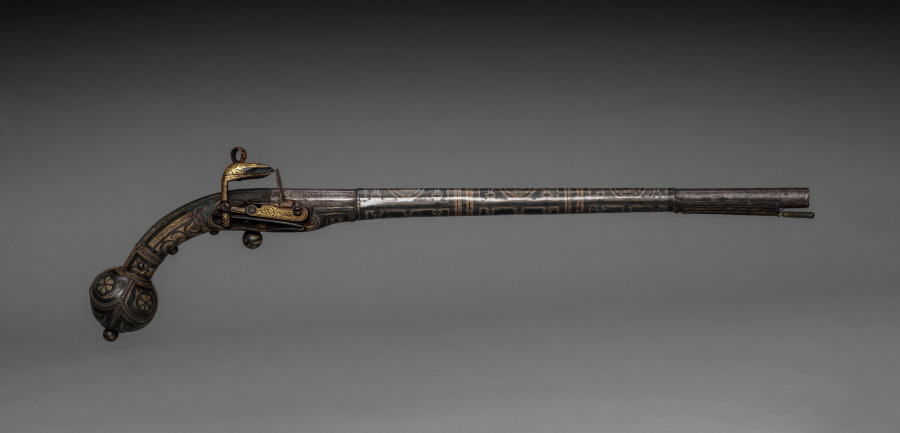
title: Ball-Butted Miquelet-Lock Pistol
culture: Caucasus, Daghestan, 19th century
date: c. 1850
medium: steel, brass, silver; gold inlay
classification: Arms and Armor